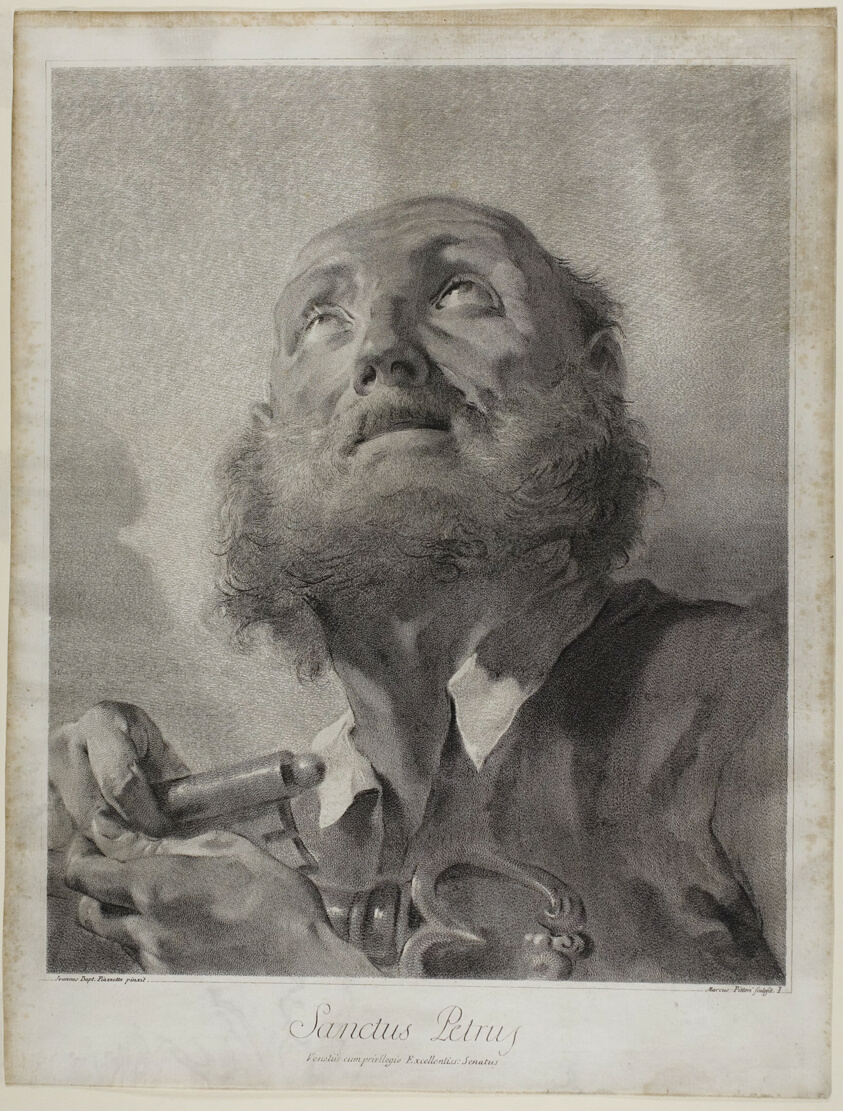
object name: Print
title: Saint Peter, from The Holy Family and the Twelve Apostles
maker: Giovanni Marco Pitteri (Italian, 1702-1786); after Giovanni Battista Piazzetta (Italian, 1682-1754)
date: 1742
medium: Engraving in black on paper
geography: Italy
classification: engraving; print; prints and drawing